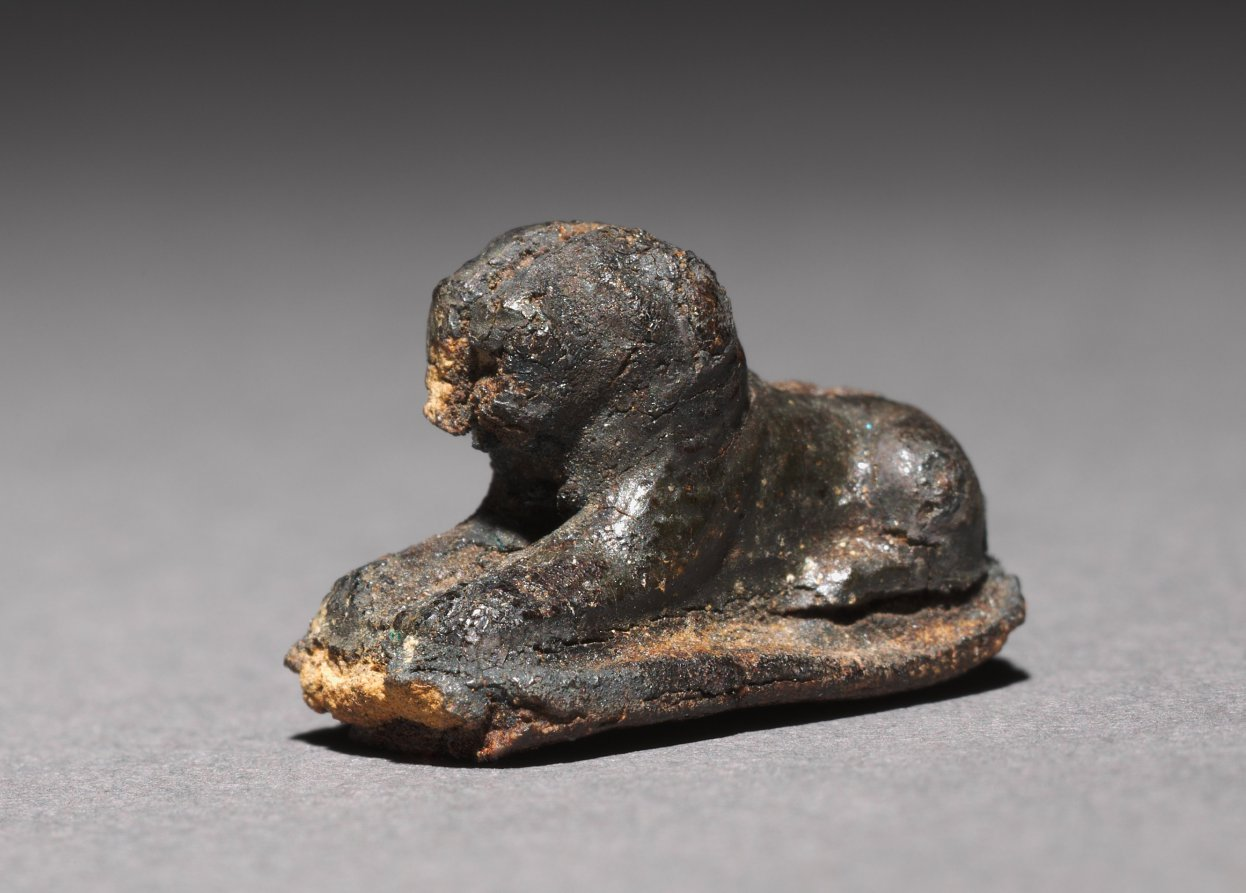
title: Recumbent Lion Bead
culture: Egypt, Middle Kingdom (2040–1648 BCE), Dynasty 12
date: 1980–1801 BCE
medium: silver foil over a clay-bulked resin core (?)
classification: Amulets